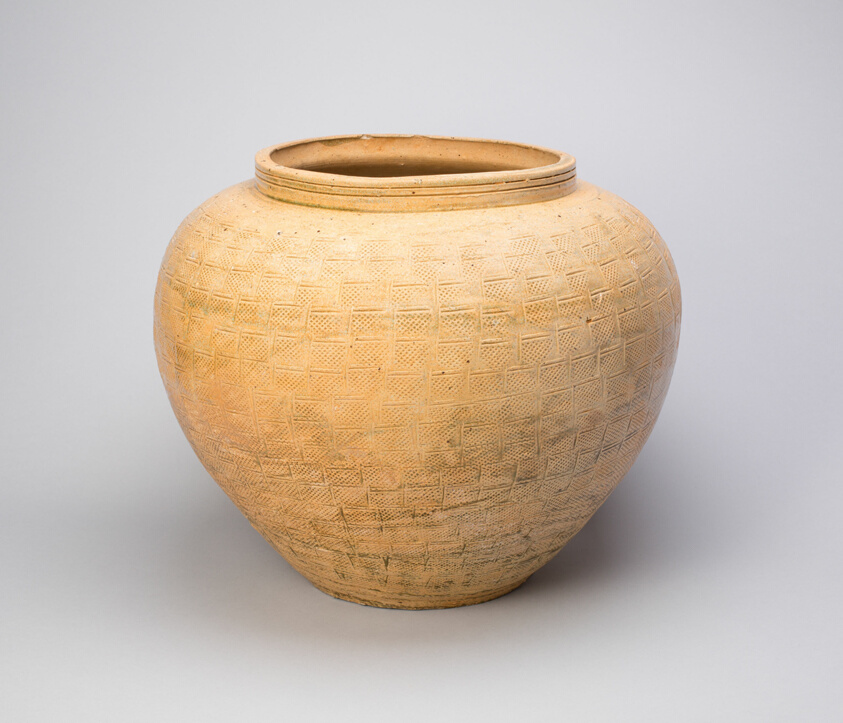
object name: Vessel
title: Jar (Guan)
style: Chinese (culture or style)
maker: China, probably Shangyu Kilns, Zhejiang province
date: Eastern Han dynasty (A.D. 25–220), 1st/2nd century A.D.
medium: Glazed gray stoneware with impressed decoration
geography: Shangyu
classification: stoneware; ceramics; asian art; vessel